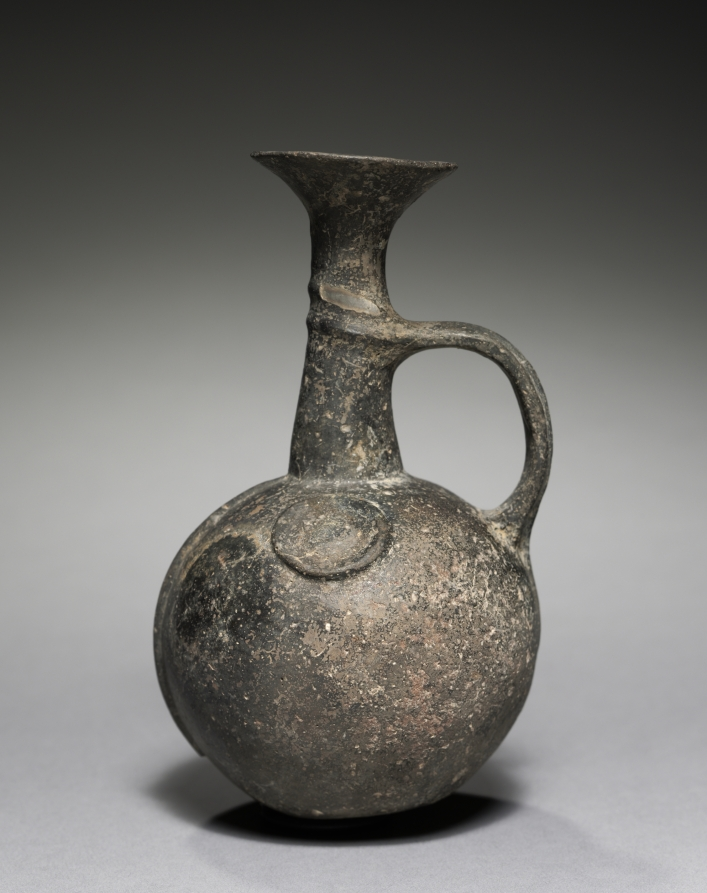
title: Jug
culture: Cyprus, late Cypriot I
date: c. 1600–1450 BCE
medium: base-ring ware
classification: Ceramic